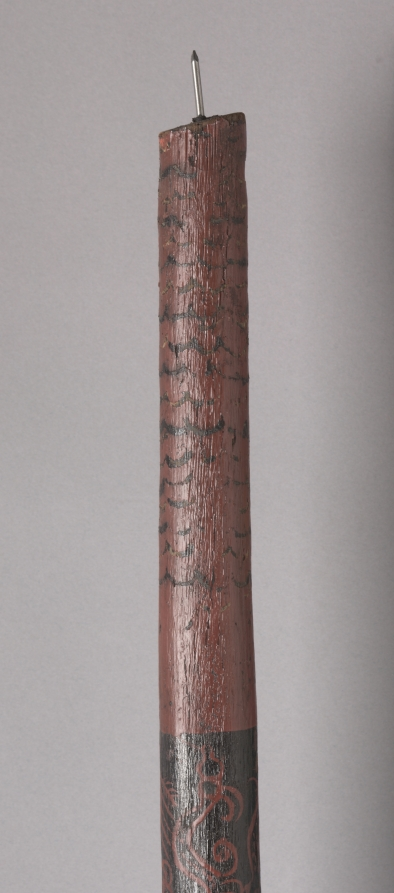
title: Cranes and Serpents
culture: China, reportedly from Hunan province, Changsha, Warring States period (475–221 BCE), State of Chu (c. 1046–223 BCE)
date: 475–221 BCE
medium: lacquered wood with polychromy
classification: Sculpture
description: A different style of ritual art developed in the state of Chu in South China. In addition to bronze vessels, lacquered wood artifacts expanded the repertory of ritual implements. This extraordinary sculpture was probably a drum stand for supporting a suspended drum in ritual ceremonies. It is unique among other excavated drum stands of the Chu, which typically show two birds standing on tigers. The theme of the bird stepping on the serpent was common in the Chu visual culture. Yet the slender proportions and seemingly flimsy structure of this particular set raise the question of whether it was utilitarian or mostly served symbolic functions in the tomb. The birds' and serpents' bodies have designs painted in red lacquer and yellow pigment against the black lacquer. Scientific analyses confirm the additional use of a blue or green pigment that has been discolored over time.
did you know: The cranes' long necks allowed a lightweight drum to be suspended from strings through the beaks, while the densely intertwined snakes provided a weighty base to stabilize the object during musical performances.